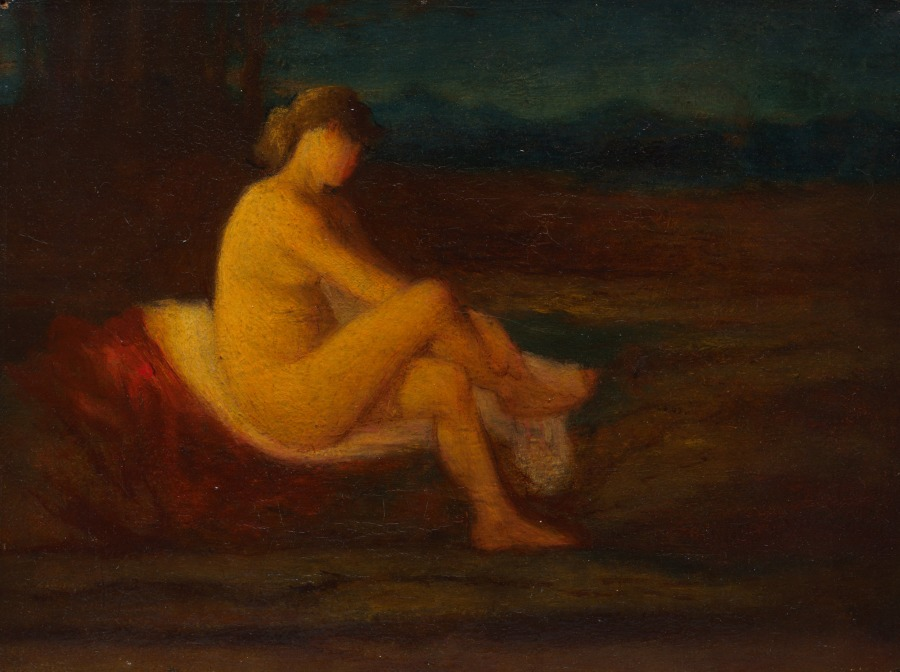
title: A Bather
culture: America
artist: Robert Loftin Newman (American, 1827–1912)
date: 1800s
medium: oil on canvas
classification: Painting